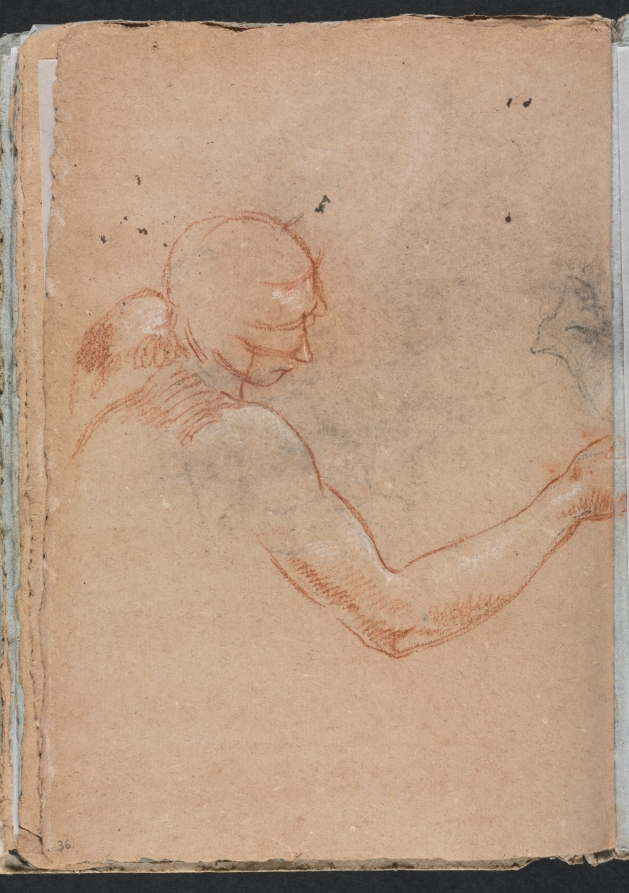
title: Verona Sketchbook: Nude with head and right arm (page 36)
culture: Italy, 18th century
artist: Francesco Lorenzi (Italian, 1723–1787)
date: 1760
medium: red chalk with white heightening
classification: Bound Volume